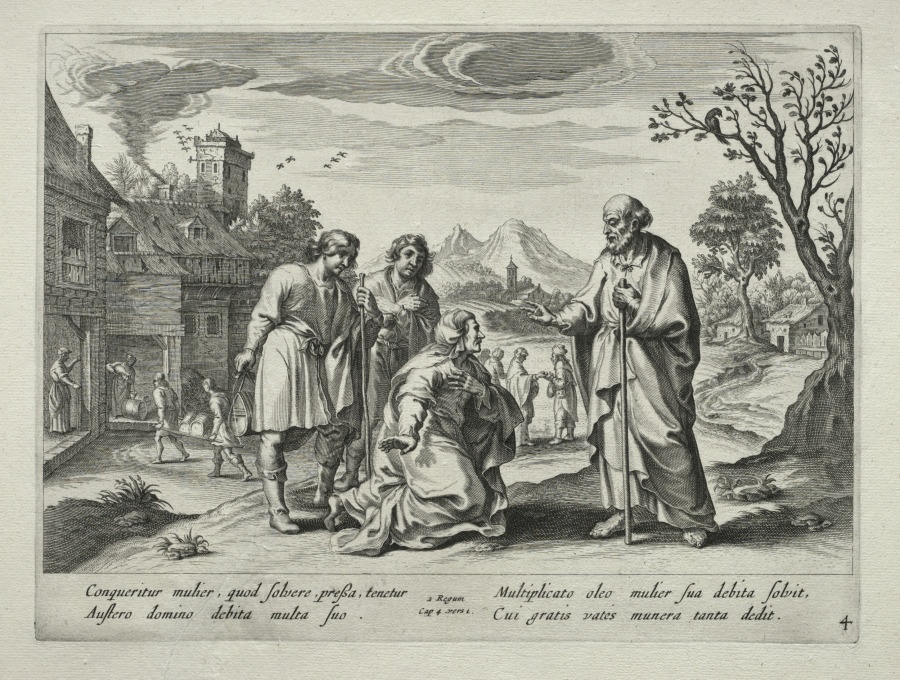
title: The Story of Elisha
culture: Flanders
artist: Nicolaes Rijckmans (Flemish, 1616-)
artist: after Pieter I de Jode (Flemish, 1570–1634)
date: 1643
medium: engraving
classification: Print